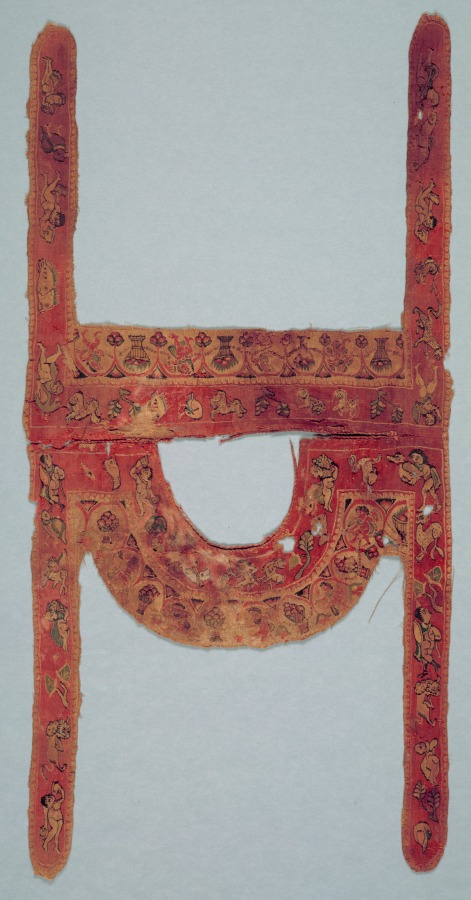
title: Fragments from a Child's Tunic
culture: Egypt, Umayyad period (661–750)?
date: 600s–700s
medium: Wool and linen: tabby weave, inwoven tapestry ornament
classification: Textile